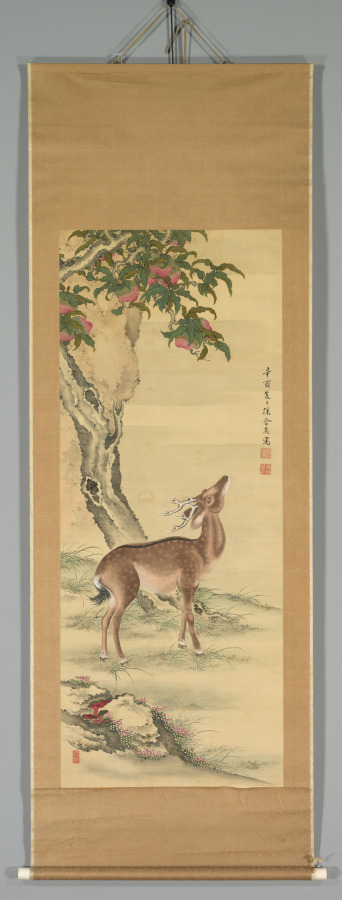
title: Symbols of Longevity: Deer under Peach and Pine (Pine) (right)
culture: Japan, Edo period (1615–1868)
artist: Toda Tadanaka (Japanese, 1761–1823)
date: 1801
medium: Pair of hanging scrolls; ink and color on silk (ivory roller ends)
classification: Painting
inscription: Righthand painting sealed lower right: rectilinear red seal above; unread, square red seal below; unread (a collector's seal)